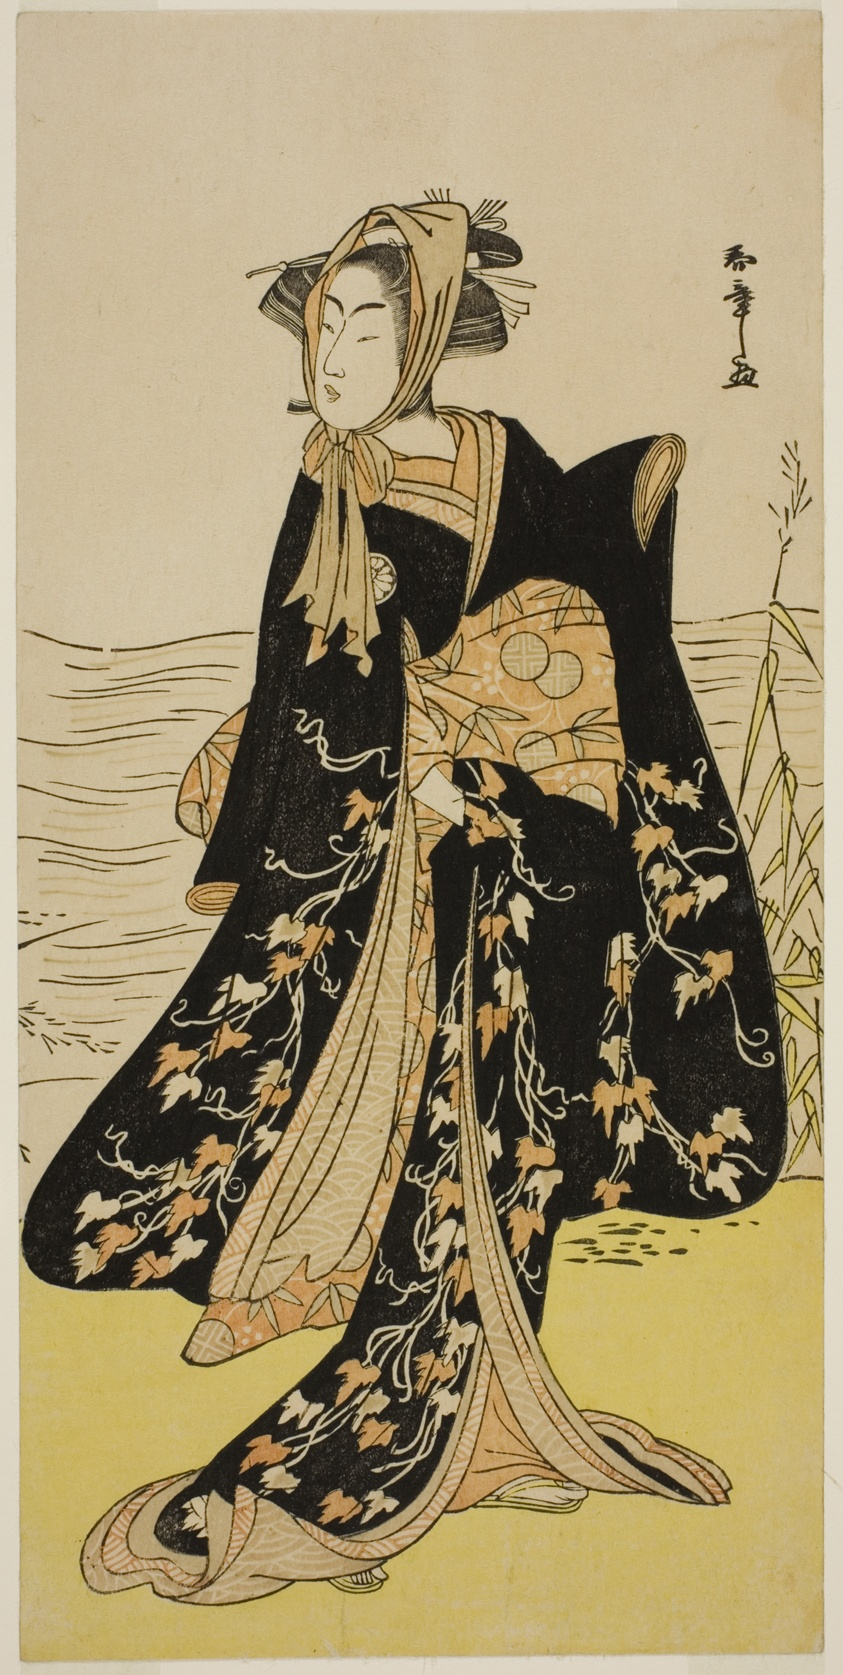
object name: Print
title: The Actor Segawa Kikunojo III as the Street-Walker Otsuyu in the Play Cho Chidori Wakayagi Soga, Performed at the Ichimura Theater in the Second Month, 1779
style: Japanese (culture or style)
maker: Katsukawa Shunsho 勝川 春章; Japanese, 1726-1792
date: c. 1779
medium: Color woodblock print; hosoban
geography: Japan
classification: woodblock print; print; asian art